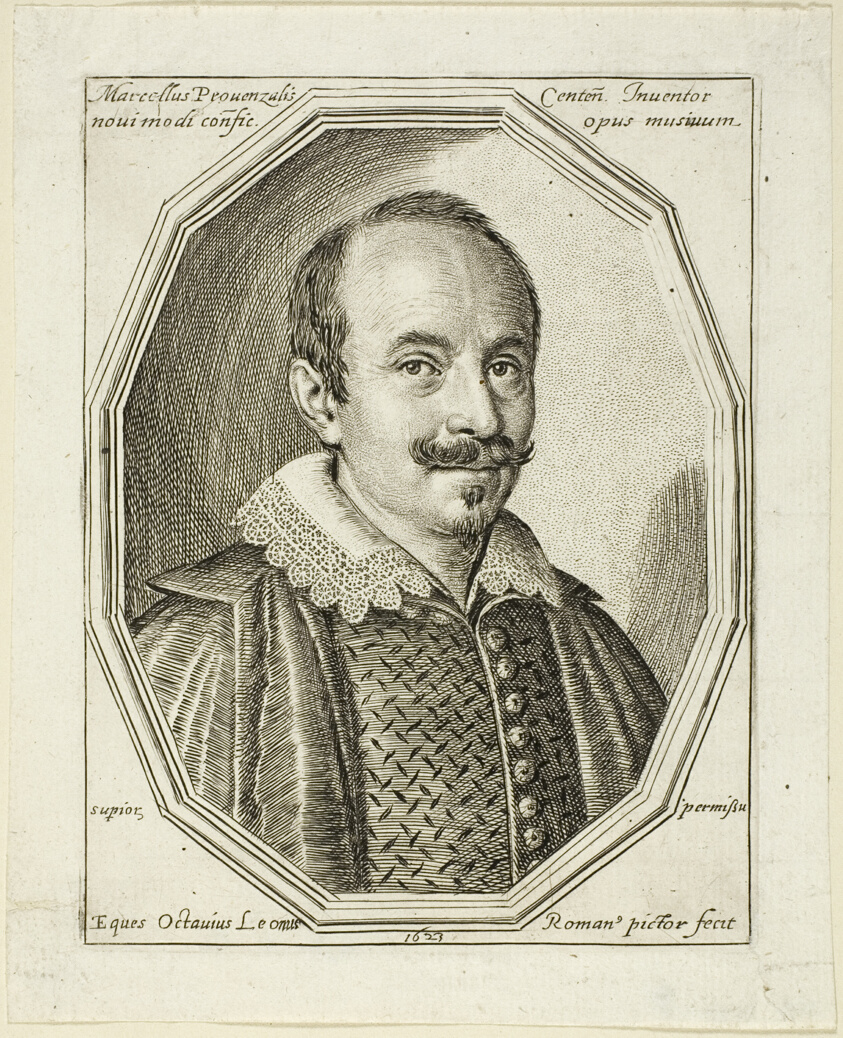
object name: Print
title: Marcellus Provenzalis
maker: Ottavio Mario Leoni; Italian, 1578-1630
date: 1623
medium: Engraving on ivory laid paper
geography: Italy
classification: etching; print; prints and drawing